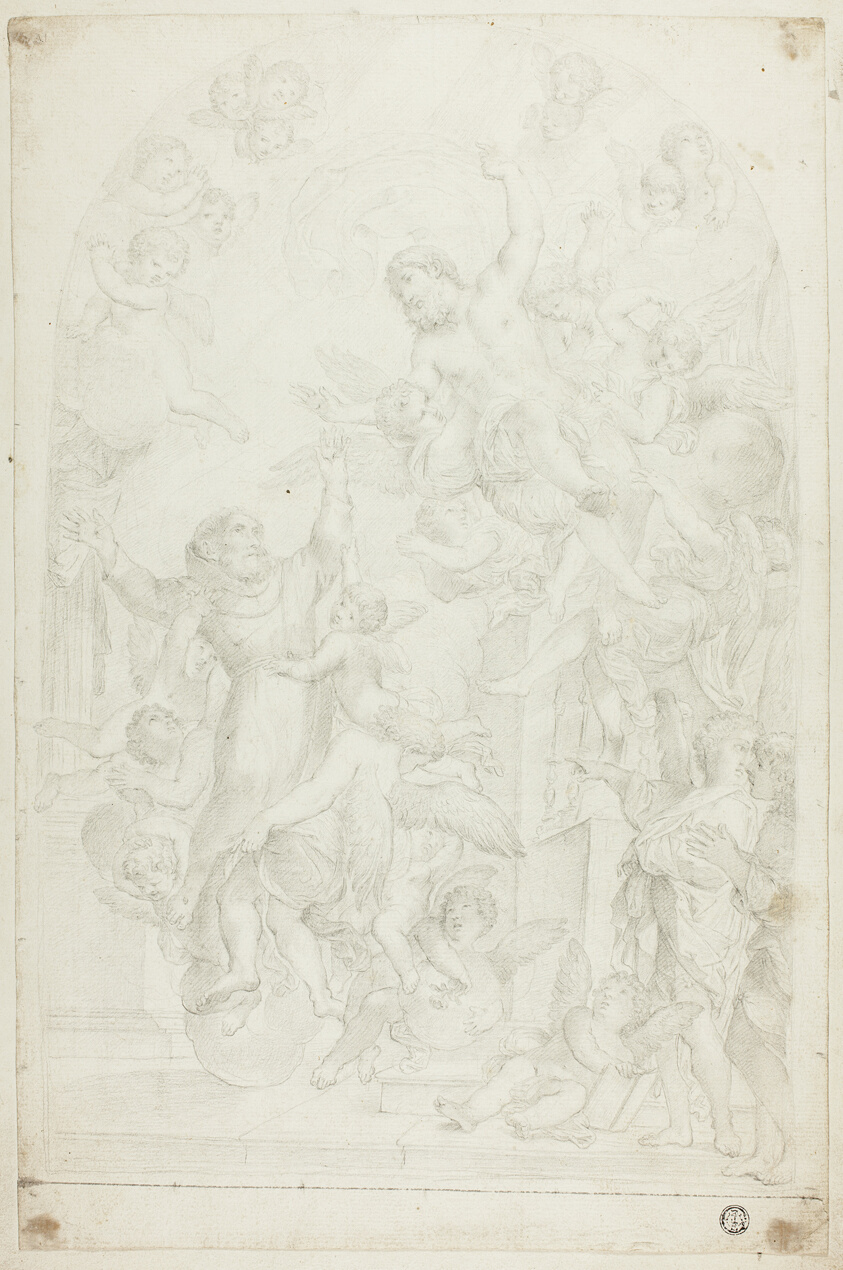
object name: Drawing and Watercolor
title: Christ Appearing to Monastic Saint in Ecstasy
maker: Follower of Carlo Maratti (Italian, 1625-1713)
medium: Black chalk on ivory laid paper, laid down on card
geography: Italy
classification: graphite; drawings (visual works); prints and drawing